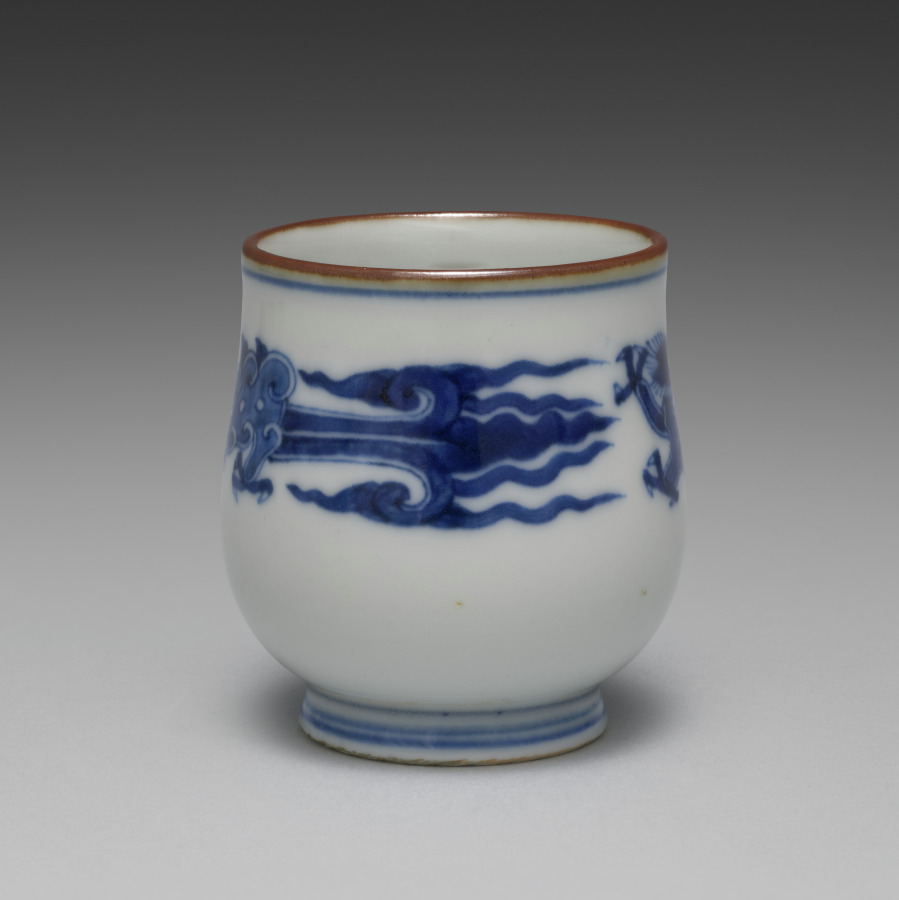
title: Cup from Sake Cups with Dragons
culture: Japan, Meiji period (1868–1912)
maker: Seifū Yohei III (Japanese, 1851–1914)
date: c. 1893–1914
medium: One from a set of six sake cups; porcelain with underglaze blue and iron oxide rims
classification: Ceramic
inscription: 大日本清風造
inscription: 清風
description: Each of these sake cups pictures two backward-looking dragons. The highly stylized creatures resemble jade carvings.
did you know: Seifū Yohei III was inspired by the Chinese mythical animals that were common on porcelain objects made at Jingdezhen in China during the Ming dynasty (1368–1644) and then exported around the world.